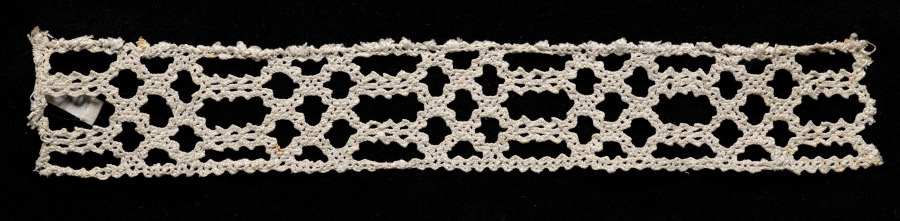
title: Lace Insertion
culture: Italy, Venice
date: 1540–60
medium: Bobbin lace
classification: Lace